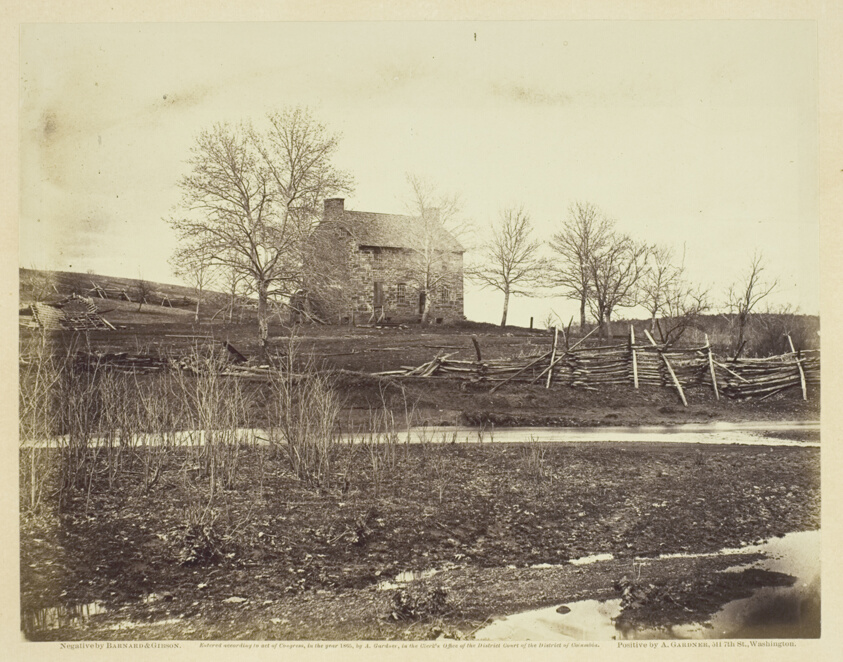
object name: Photograph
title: Mathew's House, Battle-field of Bull Run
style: 19th century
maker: Barnard and Gibson (American, active 19th century)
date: March 1862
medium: Albumen print, pl. 8 from the album "Gardner's Photographic Sketch Book of the War, vol. 1" (1866)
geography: United States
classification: photograph; albumen silver print; photography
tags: Collected by Hugh Edwards, Gardner's Photographic Sketch Book